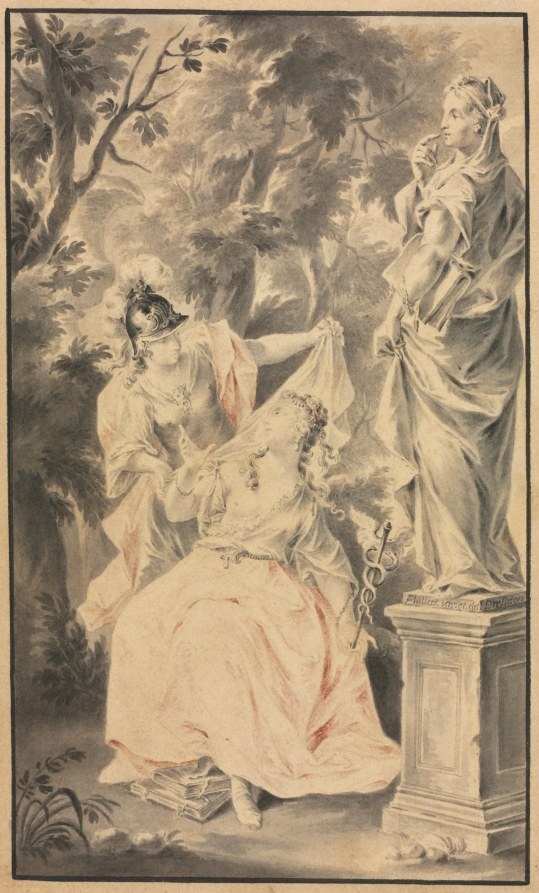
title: Allegorical Scene: Couple before a Statue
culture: Germany, 18th century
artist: F. Müller (German)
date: 1700s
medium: brush and gray wash, with brush and red wash; framing lines in black ink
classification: Drawing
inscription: signed, center right, on base of statue, in gray ink: FM[in ligature]üllers. inv: et. del. Dreßden